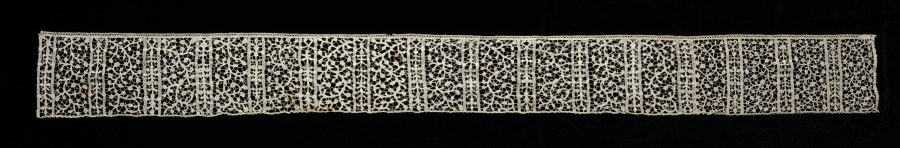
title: Lace Flounce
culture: Italy, Milan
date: 1500s–1600s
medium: Bobbin lace (Punto di Milano)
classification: Lace